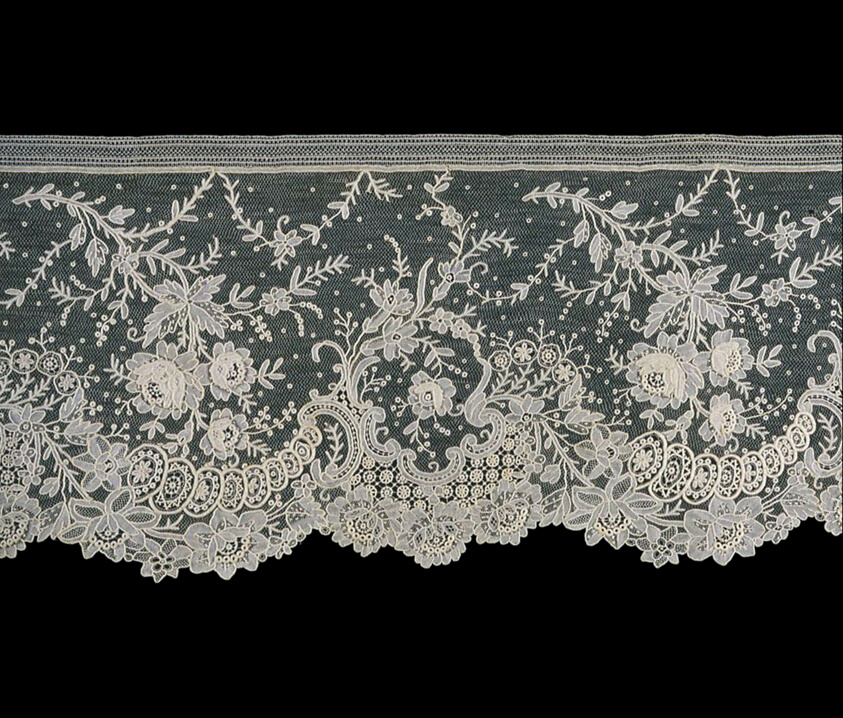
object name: Textile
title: Three Flounces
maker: Belgium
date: 1875/1900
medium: Cotton, needle lace of a type known as "Point de Gaze"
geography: Belgium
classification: textile; lace - needle; lace